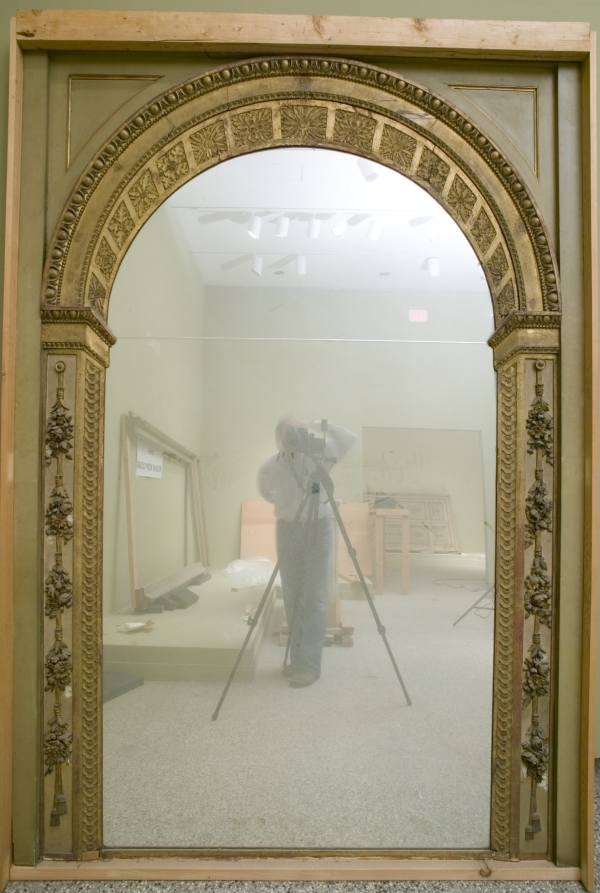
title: Overmantel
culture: France, style of Louis XVI, 18th Century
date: c. 1770–1780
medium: carved and gilded wood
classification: Furniture and woodwork